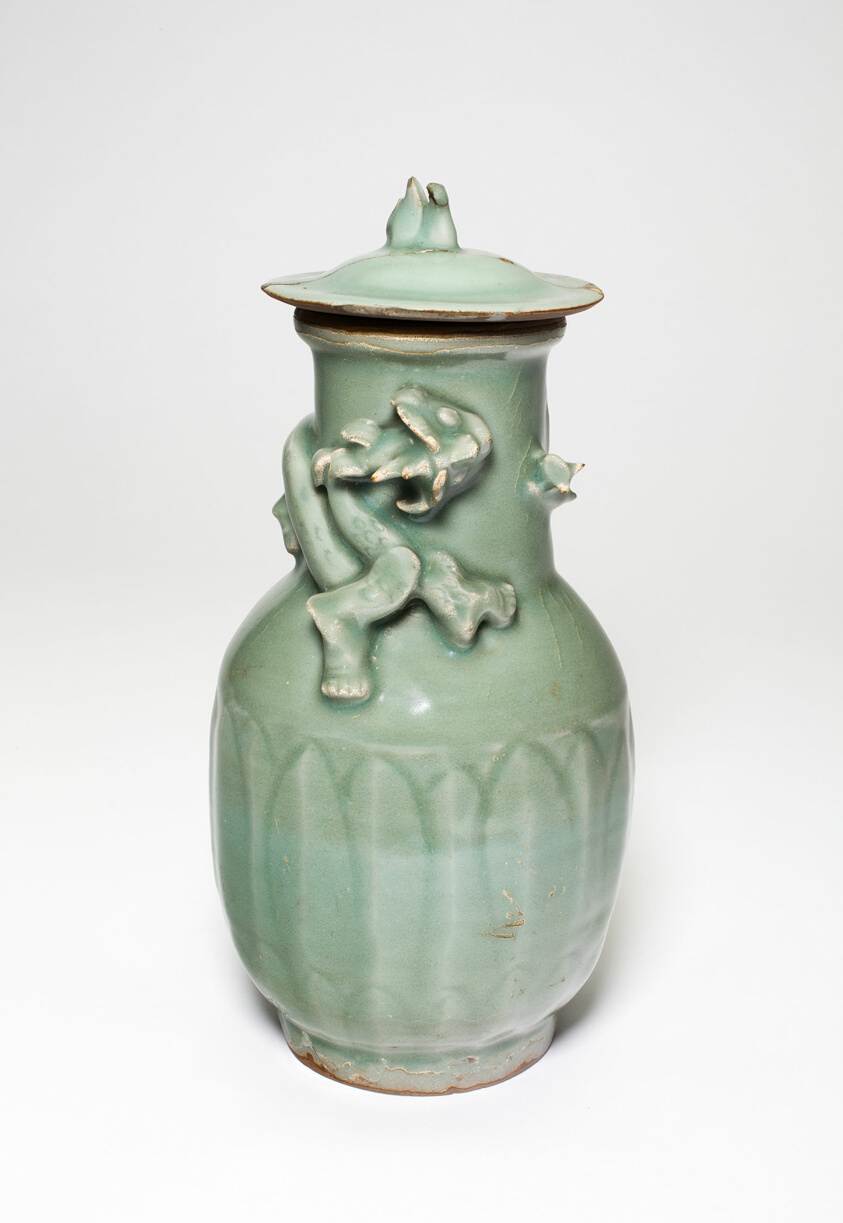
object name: Vessel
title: Vase with Lizard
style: Chinese (culture or style)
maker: China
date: Song dynasty (960–1279)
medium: Celadon-glazed stoneware and underglaze molded decoration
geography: China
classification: vase; vessel; asian art; ceramics